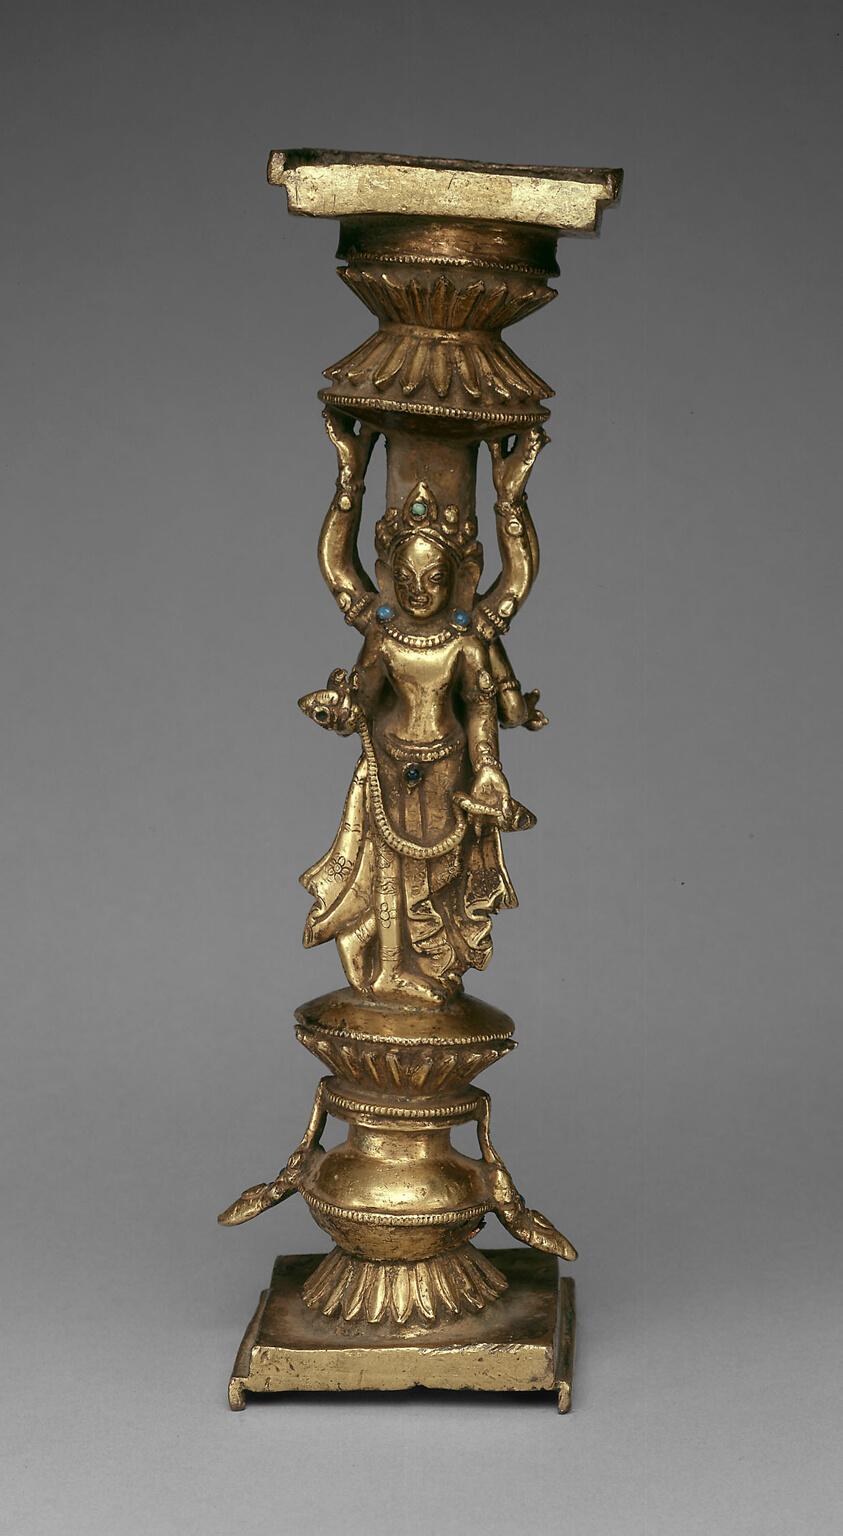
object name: Sculpture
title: Pillar Support of an Addorsed Female Bodhisattva and an Offering Goddess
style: Himalayan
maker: Tibet; Densatil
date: 15th century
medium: Gilt bronze with gemstones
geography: Tibet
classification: bronze; metal; sculpture; asian art